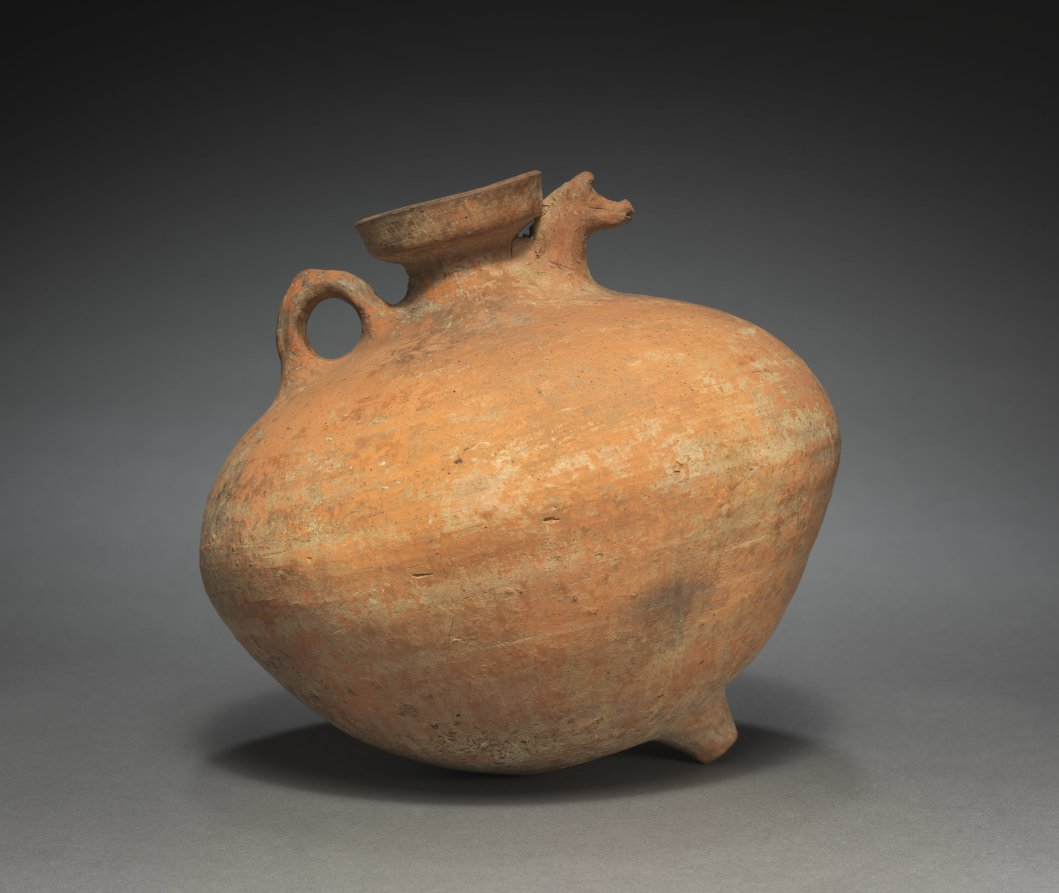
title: Rhyton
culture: Iran, Amlash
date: c. 1000–800 BCE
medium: terracotta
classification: Ceramic